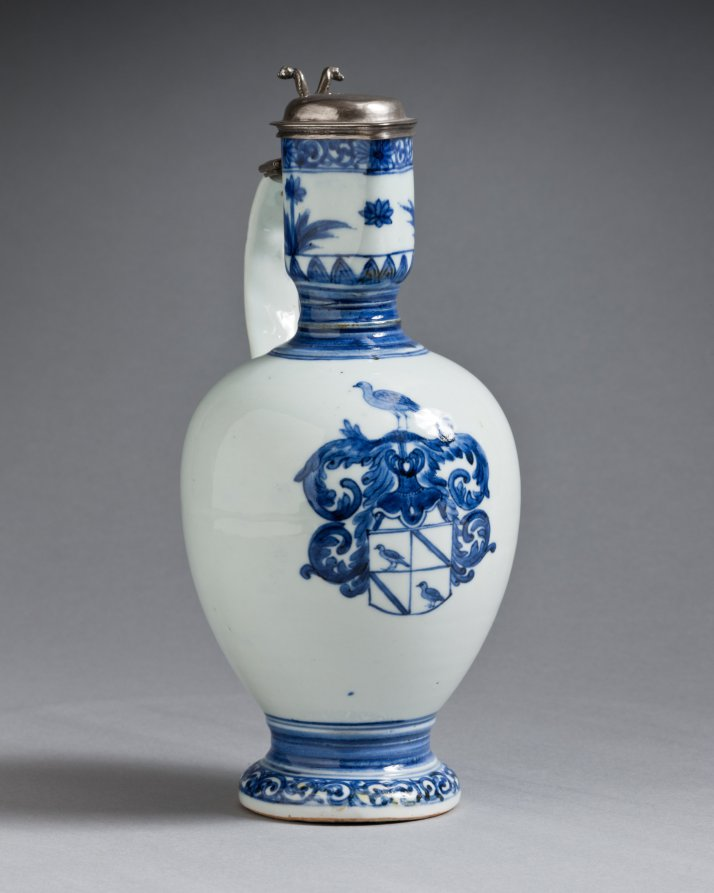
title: Jug with Silver Mounts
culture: Japan, Edo period (1615–1868)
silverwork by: Barent van Leeuwen (Dutch, 1637–1682)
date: c. 1662–76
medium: porcelain with underglaze blue decoration and silver mounts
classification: Ceramic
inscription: [on silver]: town mark for Amsterdam; lion rampant crowned (alloy mark for 0-934 silver); d (date letter for 1666), maker's mark of Barent van Leeuwen.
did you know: The coat of arms on this jug are those of the Valckenier family, active in the Dutch East India Company.